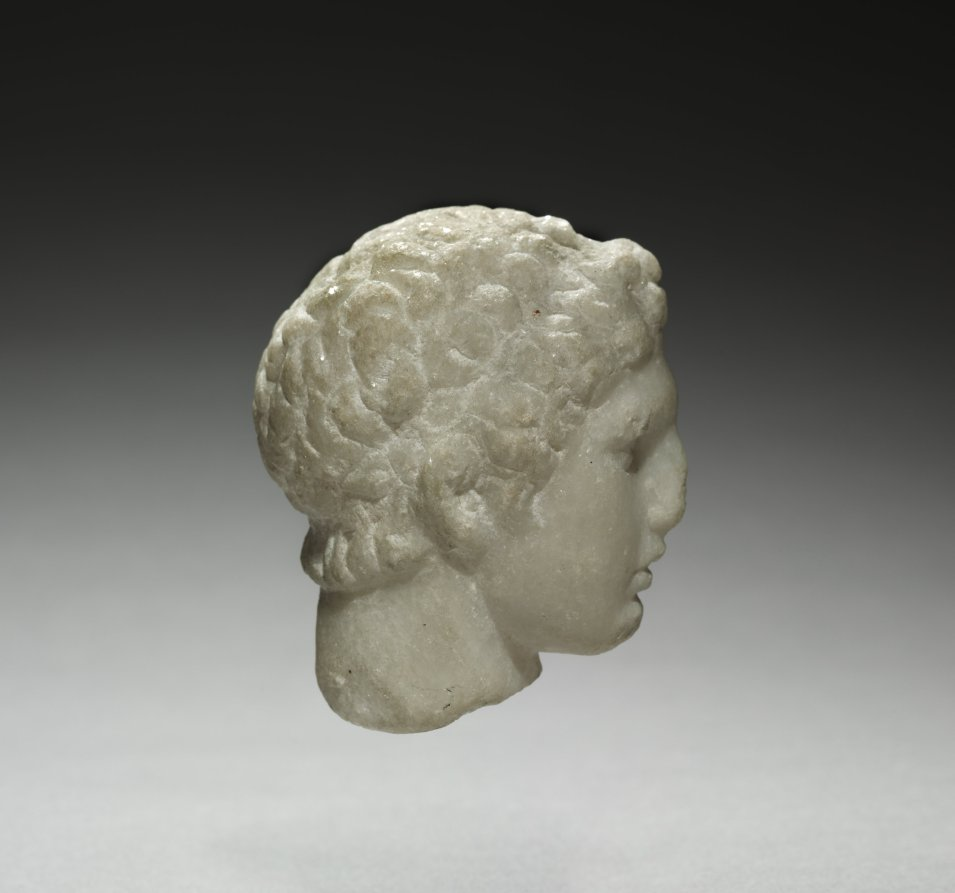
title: Head of a Man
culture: Greece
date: 200s BCE?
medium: marble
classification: Sculpture